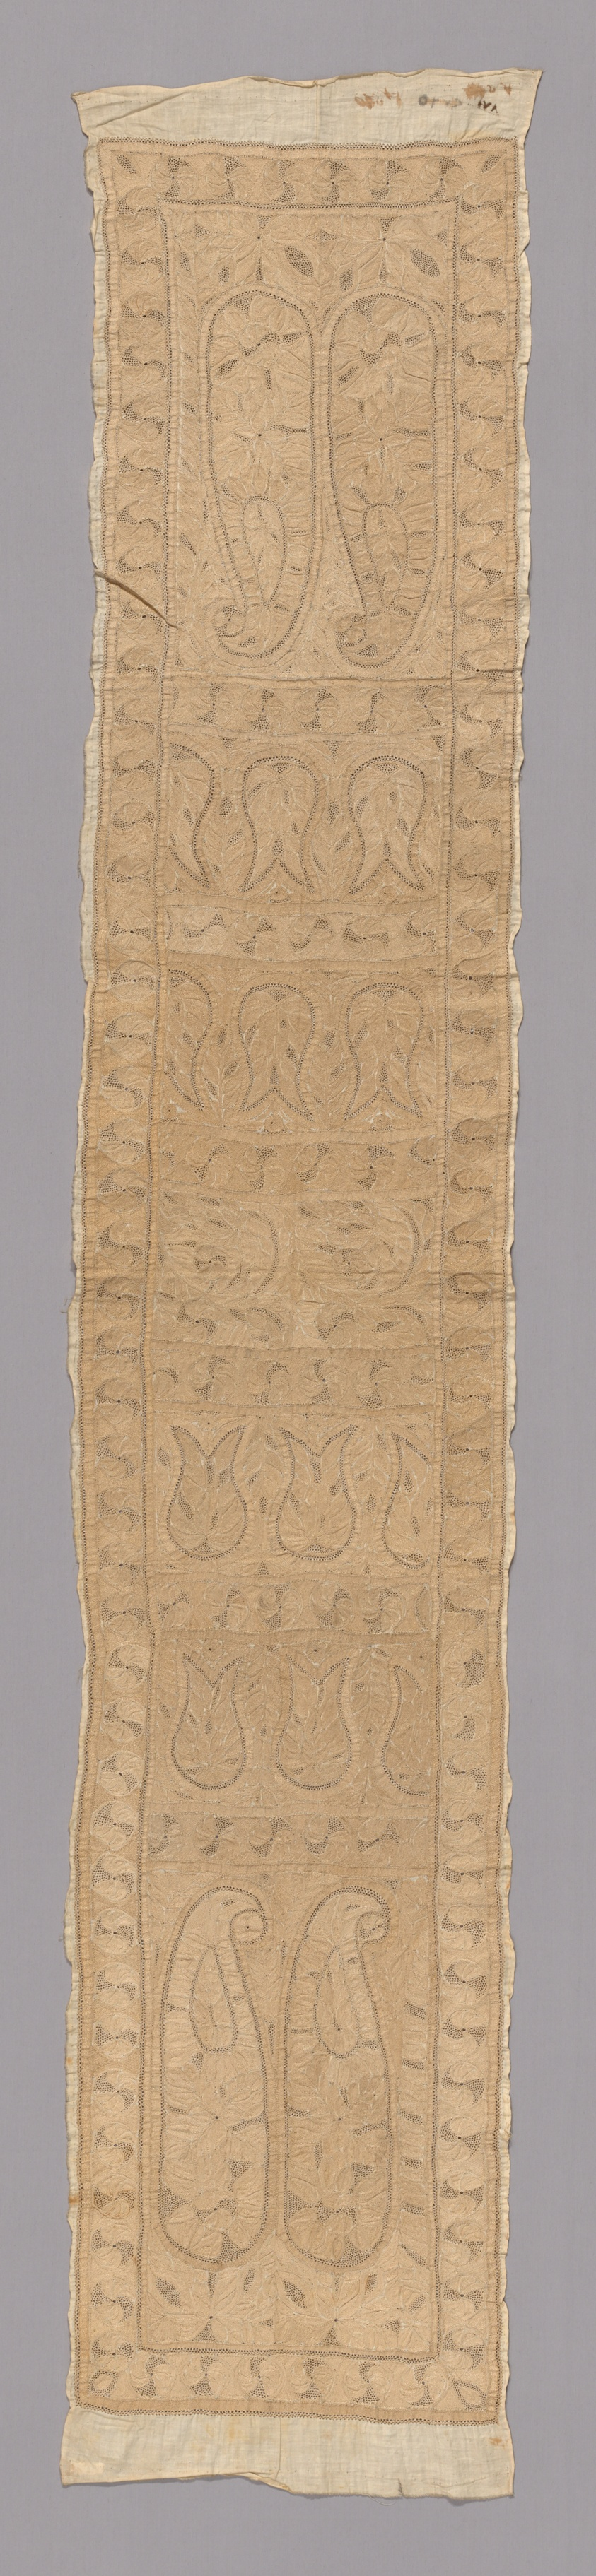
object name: Costume and Accessories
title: Sash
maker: Iran or Turkey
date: 1801/50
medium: Silk embroidery worked nearly solidly in chain stitch and drawn stitch. Fine white cotton cloth. Borders around all sides of circular spiral medallions and panels filled by bute, tulips, and floral sprays.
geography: Iran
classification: textile; needlework (visual works); costume